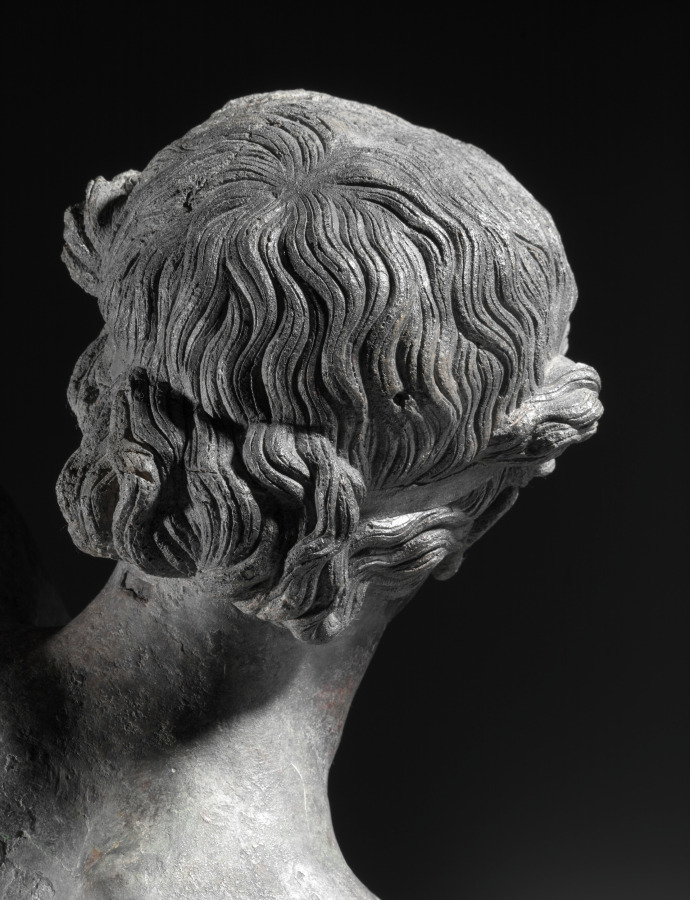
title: The Cleveland Apollo: Apollo Sauroktonos (Lizard-Slayer) or Apollo the Python-Slayer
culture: Greece, Athens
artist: attributed to Praxiteles (Greek, Athenian, c. 400–330 BCE)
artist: or Follower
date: c. 350–200 BCE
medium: bronze, copper and stone inlay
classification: Sculpture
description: The Cleveland Apollo was cast in multiple sections using the indirect lost-wax technique. First, molds were taken from a working model (now no longer known or preserved), which was then reproduced in hollow wax sections, each filled with a clay core. After details were added to the wax models, each was encased in clay. Then, the wax was heated, melted out, and replaced by molten bronze. Once cooled, the hollow bronze sections were fused together and finished, patching flaws and adding inlays and other details. Since the initial model was retained, it could be reused, allowing ancient sculptors to create multiples and variations of favorite works. Thus, remarkably, the Cleveland Apollo may once have been one of several such works. The consistently thin walls of the Cleveland Apollo (mostly 5-6 mm thick), together with the nearly invisible joins between most cast sections, show that it was created by highly skilled sculptors and foundry workers. Close looking reveals several noteworthy features. First, ovals atop the right foot mark a fusion weld, where molten bronze pooled to join separately cast sections. Second, small rectangular bronze patches cover parts of the surface (especially the right hip), each carefully cut and then hammered into place over holes or other casting defects. Inlaid lips, nipples, and eyes (the right ancient stone, the left now a modern replacement) added to the lifelike appearance of the sculpture, contrasting with the once bronze-colored skin. Finally, radiography helps to illuminate hidden features, such as the cast edge of the neck of Apollo.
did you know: Ovals across the top of the right foot show a clear join between separately cast sections.